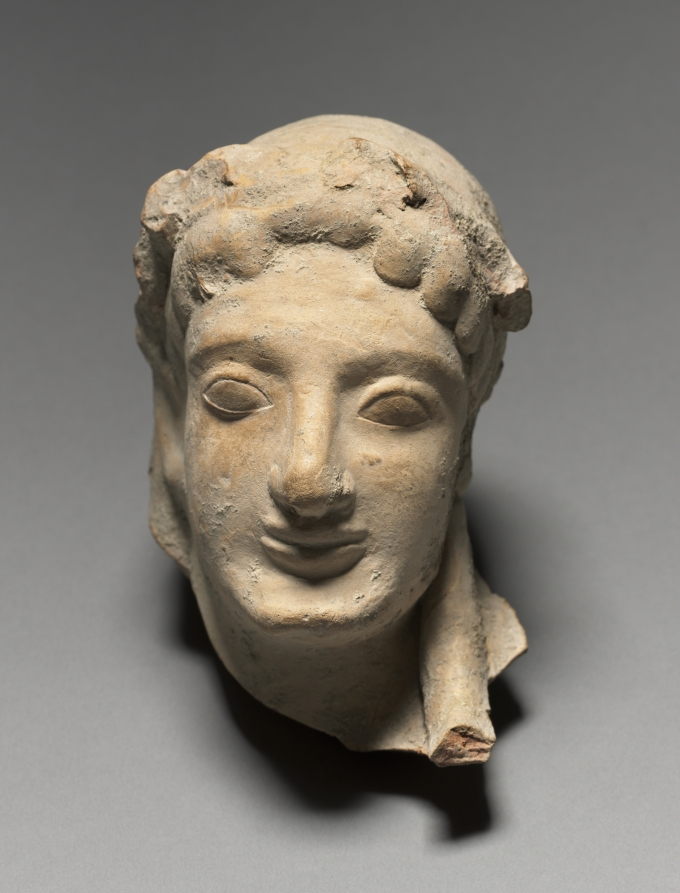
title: Head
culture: Greece, Sicily, Selinus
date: 525 BCE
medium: terracotta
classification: Sculpture